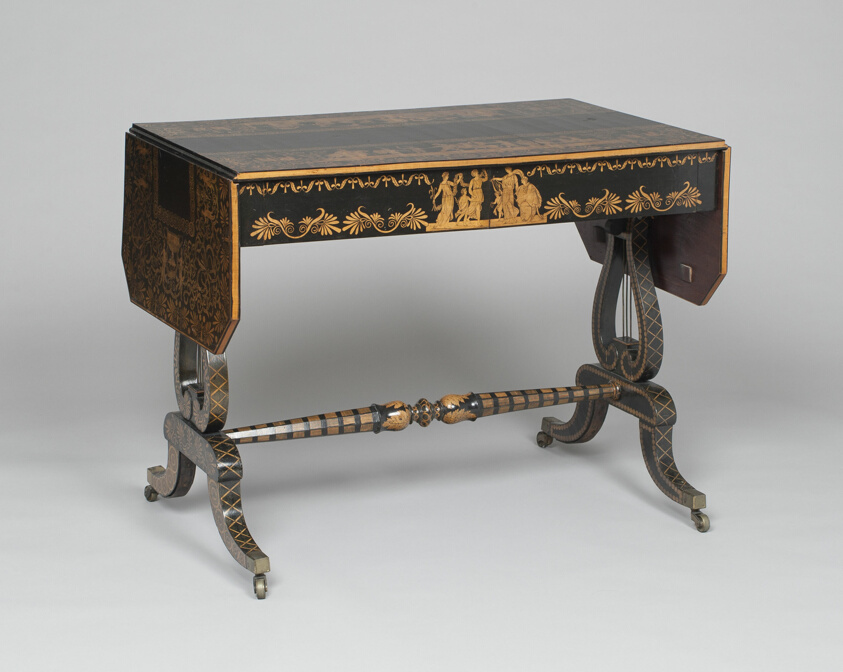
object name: Furniture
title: Sofa Table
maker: England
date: c. 1810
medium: Mahogany, holly, ebonized holly, and penwork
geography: England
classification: table; furniture; european decorative arts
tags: furniture